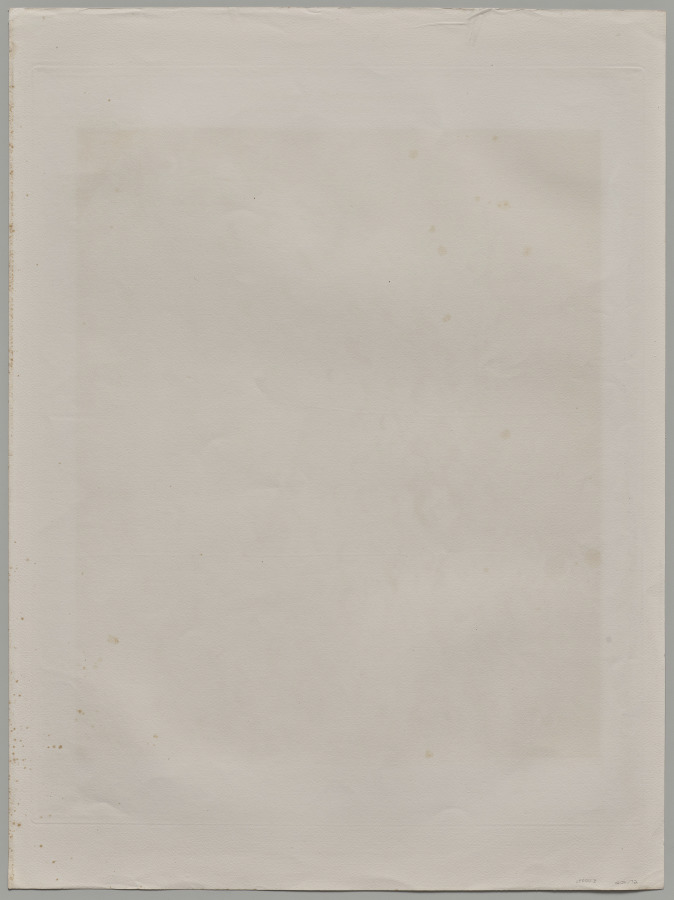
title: Photographie Lunaire: Copernic-Képler-Aristarique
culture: France, 19th century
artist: Maurice Loewy (French, 1833–1907)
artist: Pierre Henri Puiseaux (French, 1855–1928)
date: 1896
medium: photogravure (heliogravure)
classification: Photograph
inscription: Imprinted in black type on recto of photo paper: "Grand Equatorial Coude" Imprinted in black type on recto of photo paper: "1896. 29 Septembre 16 h O.tin.Paris Agrandissement 8.75 Diametre Lunaire 1 m 43" Imprinted in black type along each edge: "1-9" Imprinted in black type on gallery label on verso: "Fraenkel Gallery/49 GEARY STREET SAN FRANCISCO 94108/FURTHERMORE/[30TH Anniversary Exhibition]/Fraenkel Gallery/April 22-June 26, 2010" Imprinted in black type on gallery label on verso: "Fraenkel Gallery/49 GEARY STREET SAN FRANCISCO 94108/LOEWY & PUISEUX/Photographie Lunaire: Copernie-Kepler-/Aristarique, Septembre 29, 1896 heliogravure/22-1/2 x 18-3/4 inches (image)/29-1/2 x 22 inches (sheet)/Plate XVI/[LP.0302.Z]"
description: This plate is from a deluxe 12-volume atlas of the moon created by astronomers Maurice Loewy and Pierre Henri Puiseaux. The atlas remained the most accurate reference of the moon’s surface until the age of space travel. The duo captured thousands of images at the Paris Observatory through a telescope that Loewy invented. It was equipped with a mechanism that tracked the moon’s movements during the exposures. Given weather conditions, they were only able to photograph 50 to 60 nights per year; the project thus took 15 years to complete and contained nearly 100 large-scale photogravures.